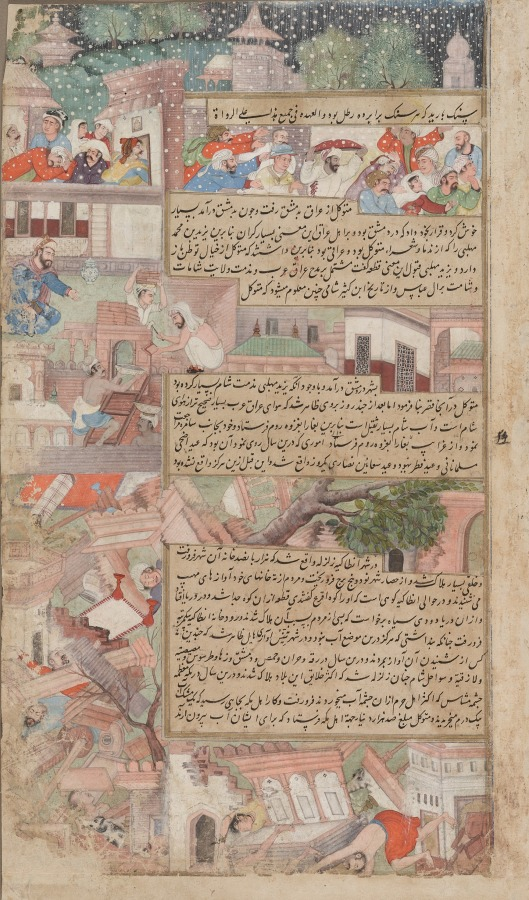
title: Page of disasters, from the Tarikh-i Alfi (History of the Thousand [Years])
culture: India, Mughal school, 16th century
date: c. 1595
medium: Gum tempera, ink, and gold on paper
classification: Painting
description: The 1,000th anniversary of Islam, according to the Hijri calendar followed by the Mughals and all Muslims, occurred during Akbar’s reign in 1592. He commemorated this milestone in many ways, including the commissioning of a new history of the Islamic world since the death of the Prophet Muhammad in 632. The episode discussed on this page took place during the 800s, when hailstorms beset Egypt and an earthquake hit Syria. The ruling caliph at the time was strongly prejudiced against Muslims who belonged to the Shi‘ite branch of Islam. Akbar seemed to be asking his artists to emphasize the natural disasters that took place, suggesting that they occurred as a result of the ruler’s intolerance.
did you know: Devastation after an earthquake includes a horse trapped under a fallen pavilion.